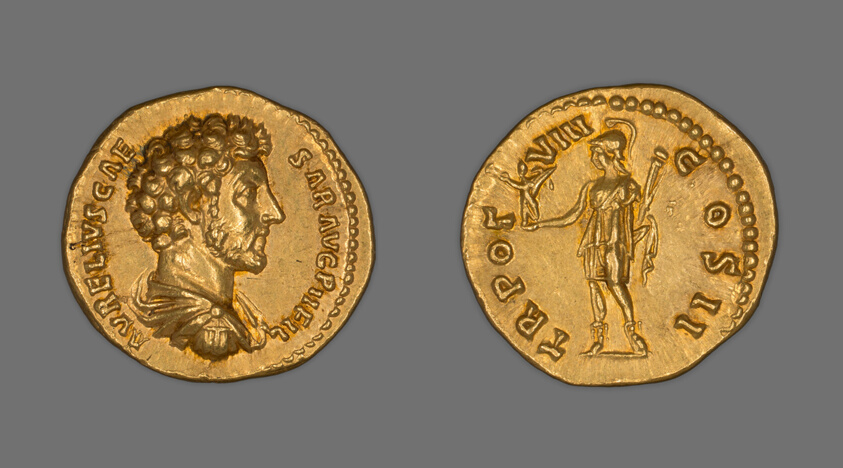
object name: Coin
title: Aureus (Coin) Portraying Marcus Aurelius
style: imperial (roman), roman (ancient, style or period)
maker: Roman, minted in Rome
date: 153-154, issued by Antoninus Pius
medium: Gold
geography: Rome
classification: coin; ancient art